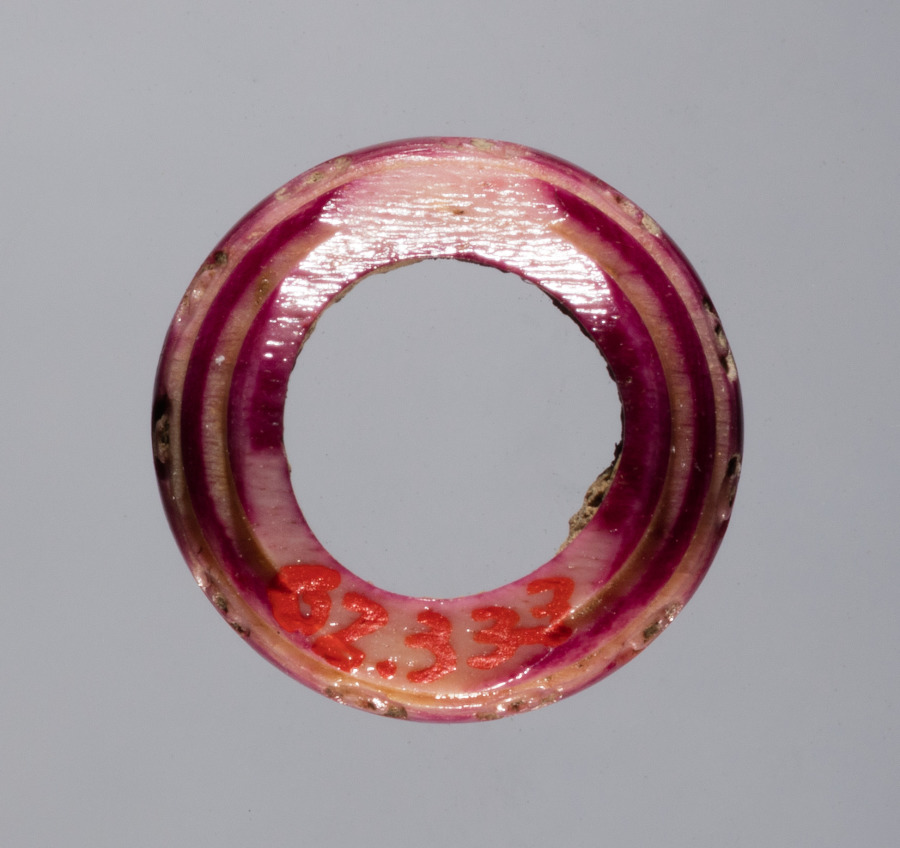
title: Spindle Whorl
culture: Iran, early Islamic period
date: 700s - 900s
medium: bone, incised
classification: Spindle Whorl